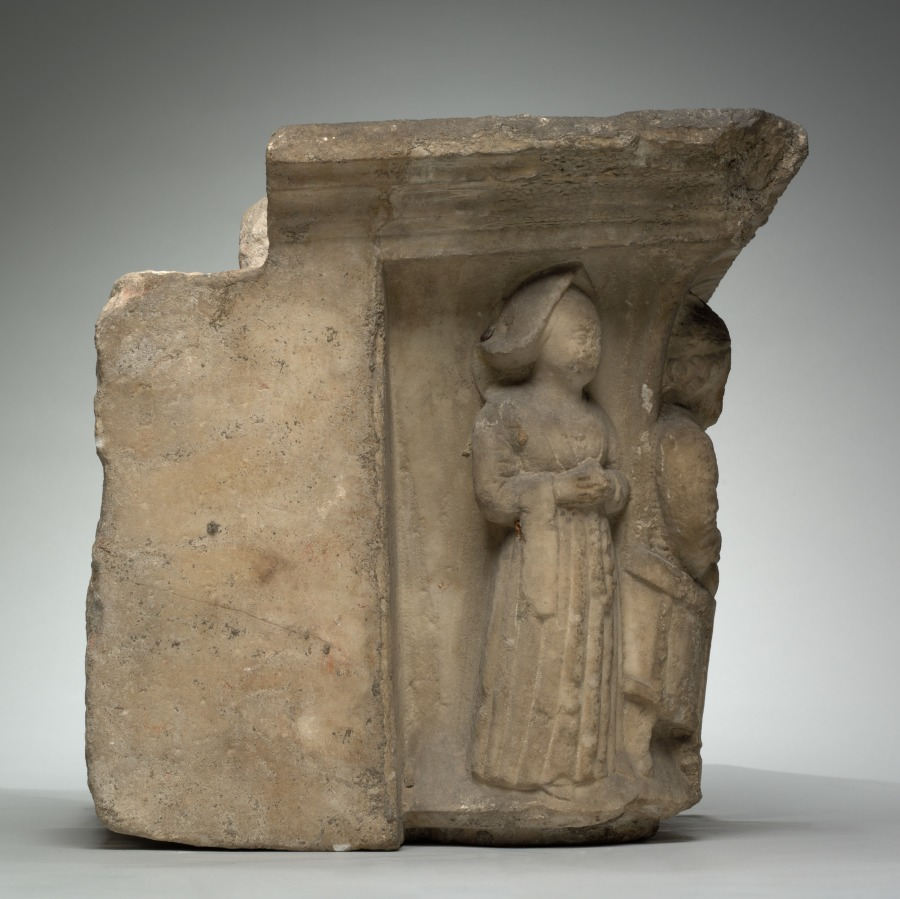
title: Engaged Capital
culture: Southern France, Abbey of Larreule, near Tarbes, 15th century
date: 1400s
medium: limestone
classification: Sculpture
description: This capital belongs to a surviving group including other architectural fragments that once decorated the cloister of the Abbey of Larreule. A cloister was a covered walkway or arcade, usually around all four sides of a square area of grass (the "cloister garth"). The seclusion of the cloister was the monks’ exclusive domain, off limits to others. Here, the monks were supposed to pray, study, meditate, and exercise in privacy and solitude. Such cloister capitals served both to instruct the monks and as a focus for their devotions. Other capitals in this series are installed in the Jardin Massey at Tarbes, near the original abbey. An arch from Larreule has been assembled with other associated French capitals at The Cloisters in New York.